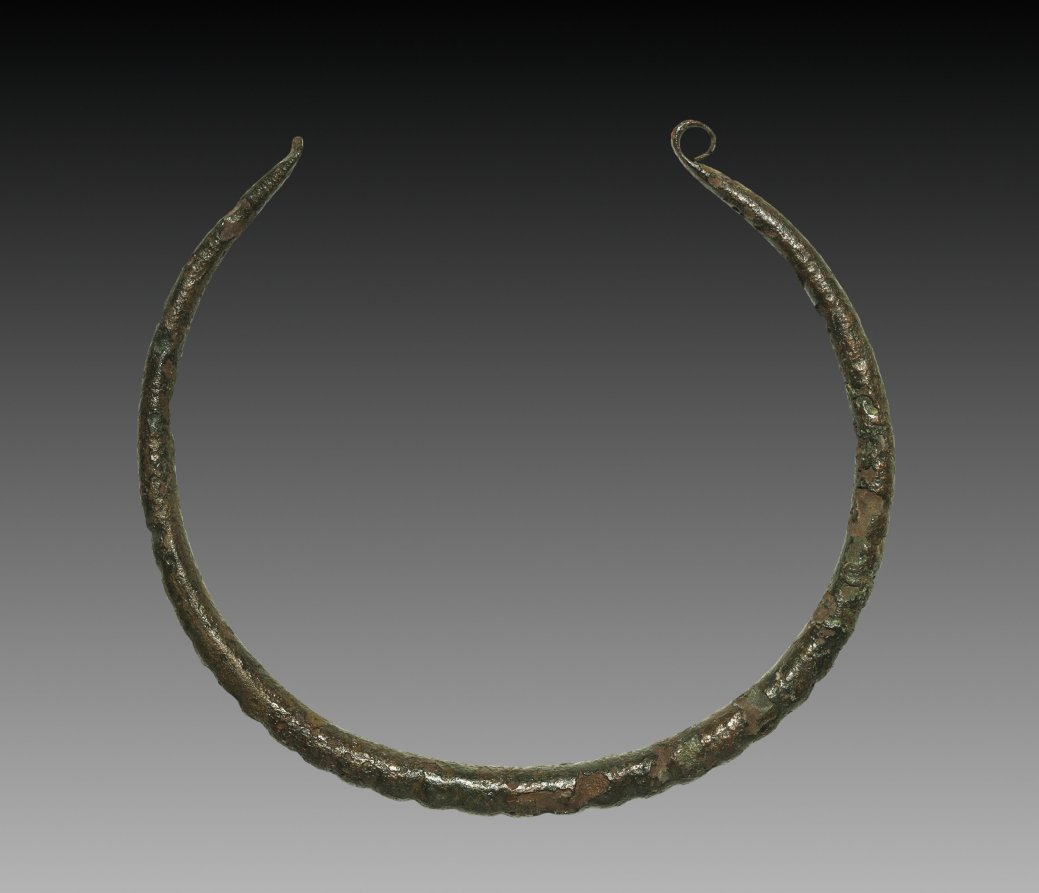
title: Necklace or Torque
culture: Iran, Luristan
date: 2000–1000 BCE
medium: bronze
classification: Jewelry